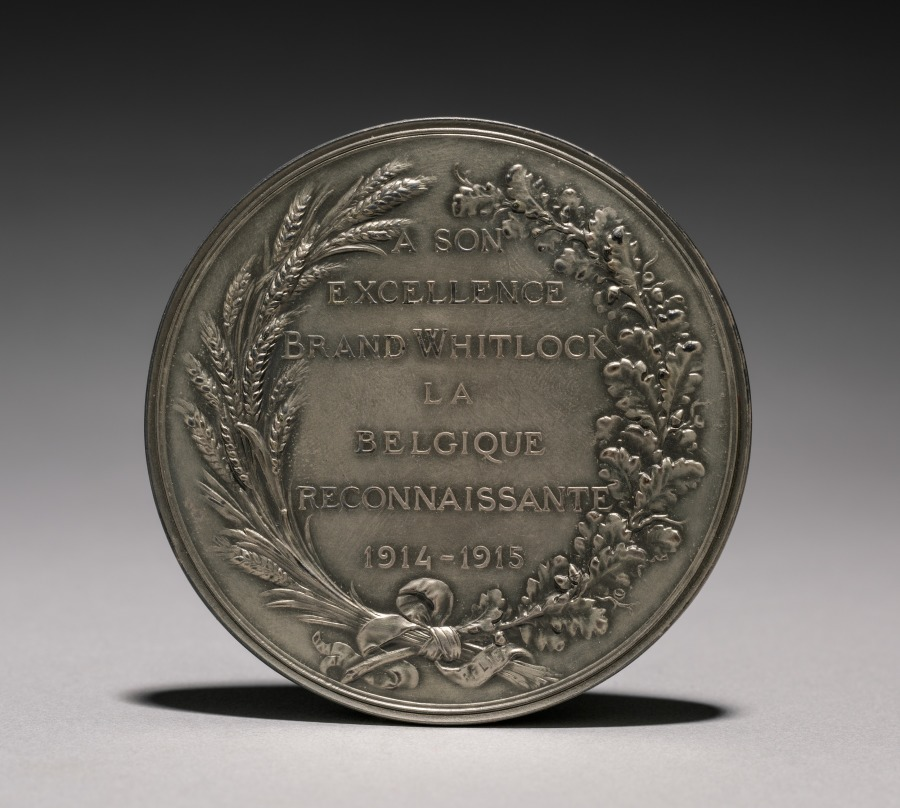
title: Medal (reverse)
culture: Belgium, 20th century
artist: Godefroid Devreese (Belgian, 1861–1941)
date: 1914–1915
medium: bronze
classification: Metalwork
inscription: "A son excellence Brand Whitlock la Belgique reconnaissante 1914-1915."